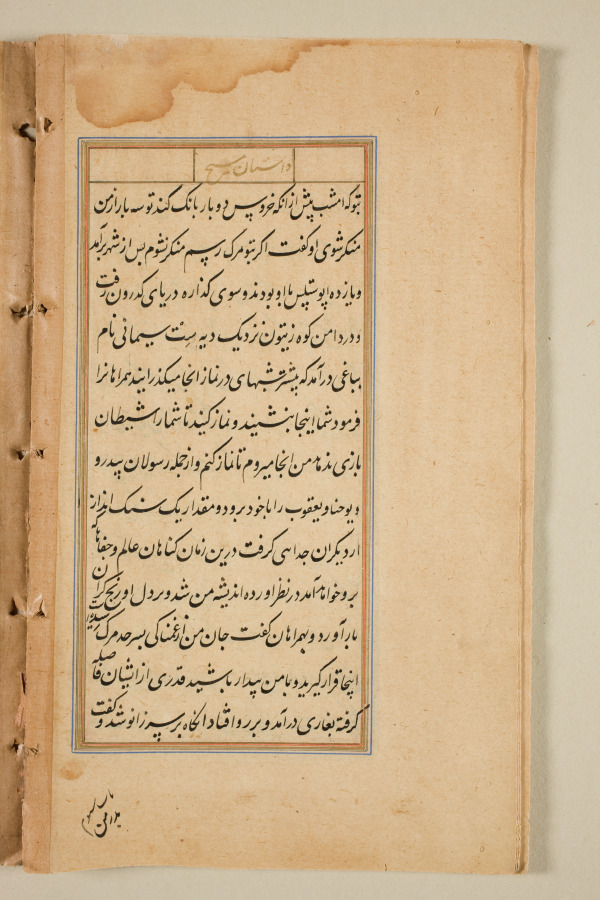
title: Text page from a Mirror of Holiness (Mir’at al-quds) of Father Jerome Xavier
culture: Mughal India, Allahabad, made for Prince Salim (1569–1627)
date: 1602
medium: Ink and gold on paper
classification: Manuscript